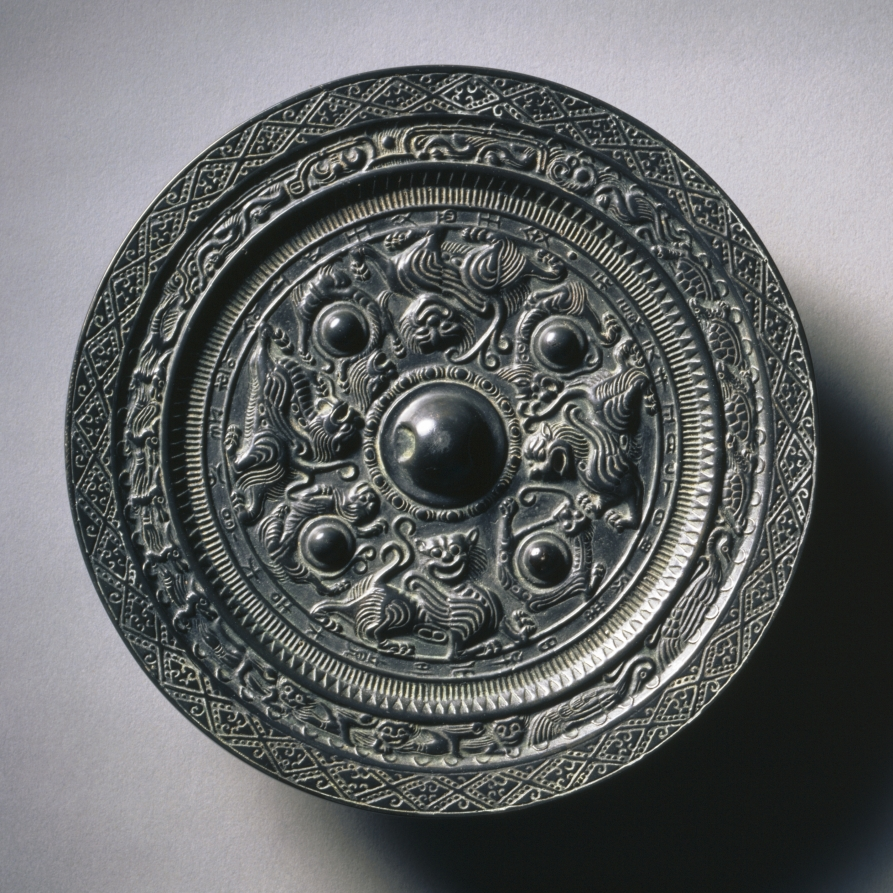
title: Mirror with Four Nipples and Eight Animals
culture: China, Western Jin dynasty (265-316 CE)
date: 300 CE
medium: bronze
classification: Metalwork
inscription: 永康元年正月午日，由（幽）【涑】黃日（白）。 早作明鏡，大吉大宮（富）。 延長壽命，上有王父西王母。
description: Inscription: On the day of wu, the first month, the first year of Yongkang, I made the bright mirror at the first of dawn by refining the yellow and the white [metals]. Great fortune and wealth will come as a result. May you live a long life. Up above are the King Father [of the East] and the Queen Mother of the West.